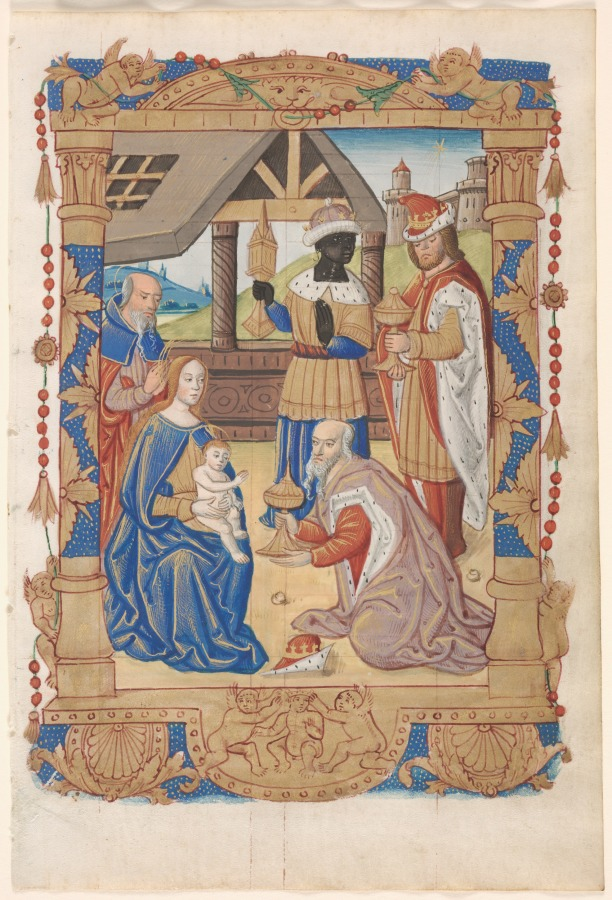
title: Leaf from a Book of Hours: Adoration of the Magi (recto) and Text with Illustrated Border (verso) (3 of 3 Excised Leaves)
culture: France, Rouen, 16th century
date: c. 1510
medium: ink, tempera and liquid gold on vellum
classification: Manuscript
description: Architectural frames, as in this miniature, became popular with the reception of Renaissance motifs north of the Alps. Winged putti, urns, garlands, masks, and scallop shells surround the main scene. These elements could be assembled in different ways so no two margins were identical. The figures themselves are still Gothic in style, with stiff folds in their clothes’ drapery. Rouen in the late 1400s and early 1500s was an established and important center of book production. Richly decorated literary texts and books of hours, such as the one which held this leaf, were made for sale next to the cathedral.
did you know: Part of a book of hours, this miniature opens the prayers to be recited at sext, or the sixth hour of the day.